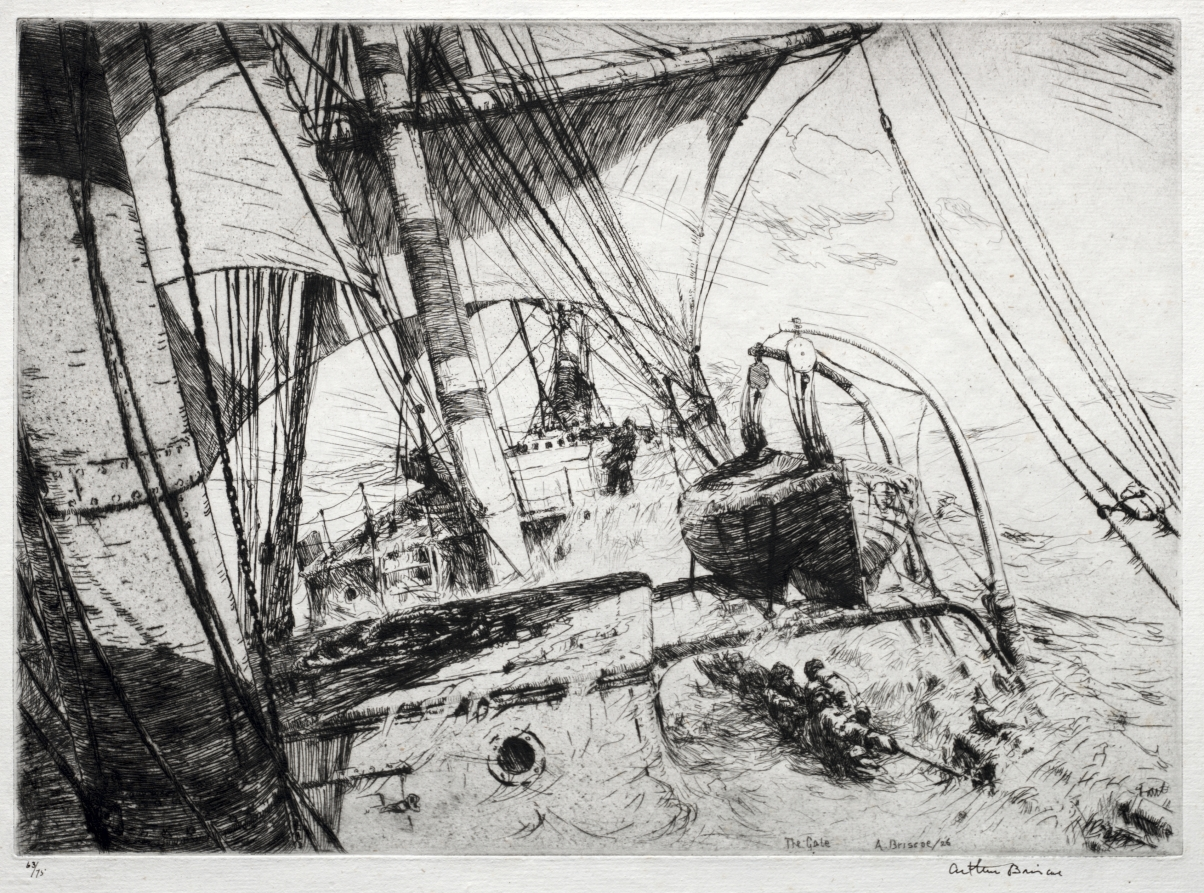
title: The Gale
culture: England, 20th century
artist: Arthur John Trevor Briscoe (British, 1873–1943)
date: 1926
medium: etching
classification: Print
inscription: Lower margin, in ink: 63/75 Arthur Briscoe